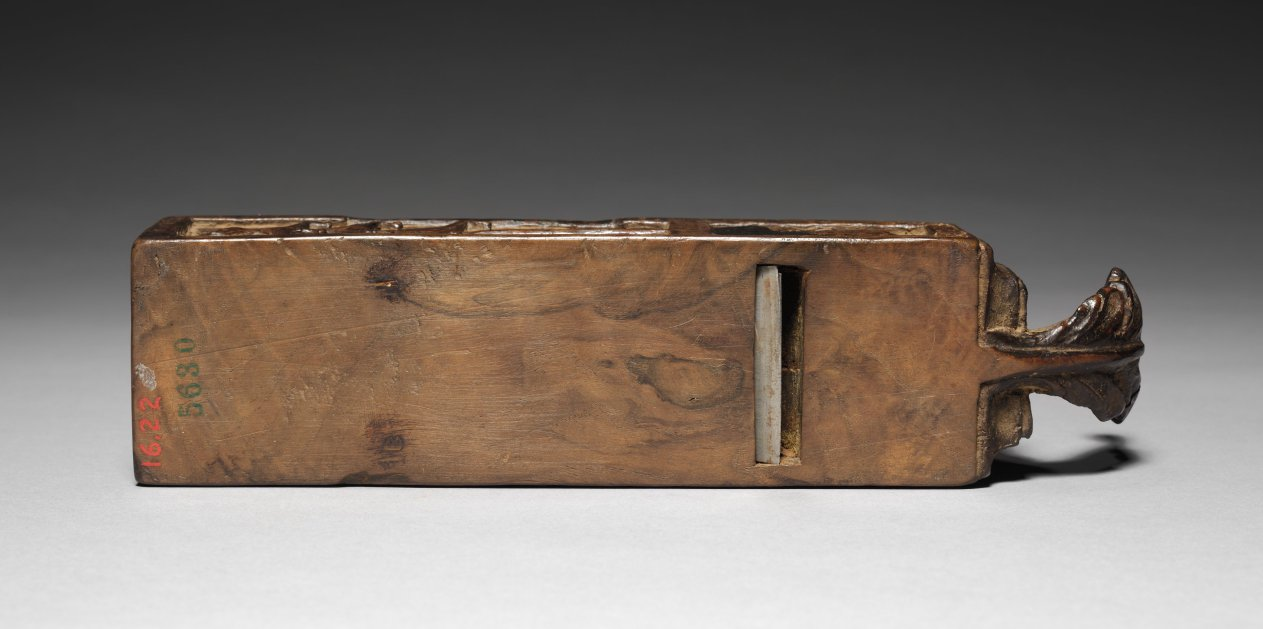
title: Carpenter's Plane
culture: Italy, late 16th century ?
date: late 1500s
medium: wood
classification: Tool